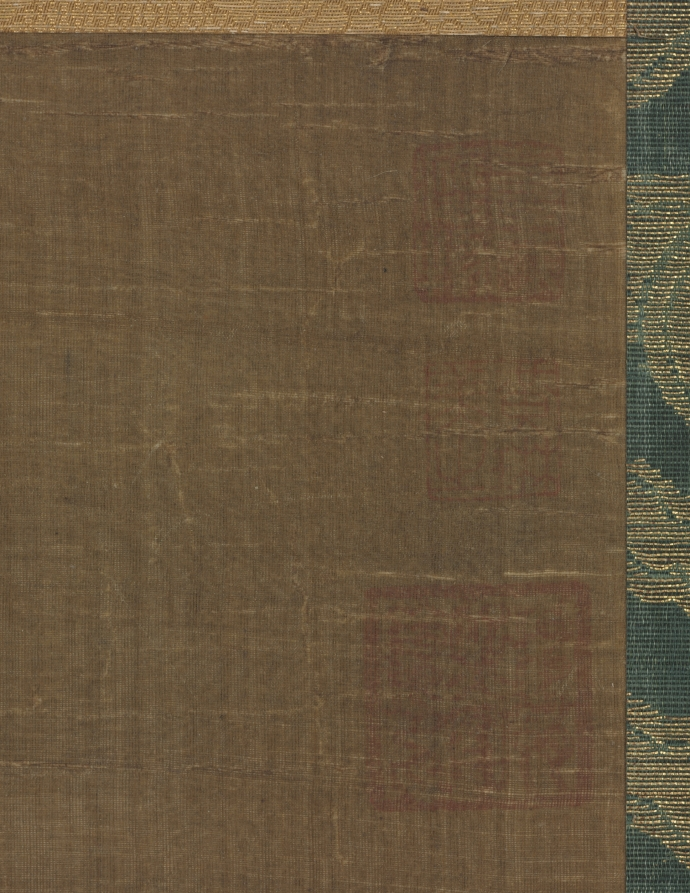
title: The Hermit Xu You Resting by a Stream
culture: China, Ming dynasty (1368–1644)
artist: Dai Jin (Chinese, 1388–1462)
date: 1400s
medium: Hanging scroll; ink and slight color on silk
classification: Painting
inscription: 5 seals: 1 of Huang Lin 黄琳 (active about 1496–1532); 4 unidentified.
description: Xu You, a recluse who refused the throne offered to him by legendary Emperor Yao, chose instead to farm on Mount Ji. Sitting under cliffs, his left arm resting on his risen leg and his loose robe revealing his belly, he displays a nonchalant attitude. Xu You is wearing a laborer’s outfit, a short robe and tight leggings, while his composed pose and gentle features reveal his lofty character. The composition shows rising mountains on the left juxtaposed by open space on the far right. Powerful brushstrokes and nuanced ink washes follow the style of the Southern Song (1127–1279) academy painters.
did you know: When the emperor offered him a post overseeing the Nine Territories (as China was known in ancient times), Xu You went to the River Ying to cleanse his ears from such an unwelcome proposition.